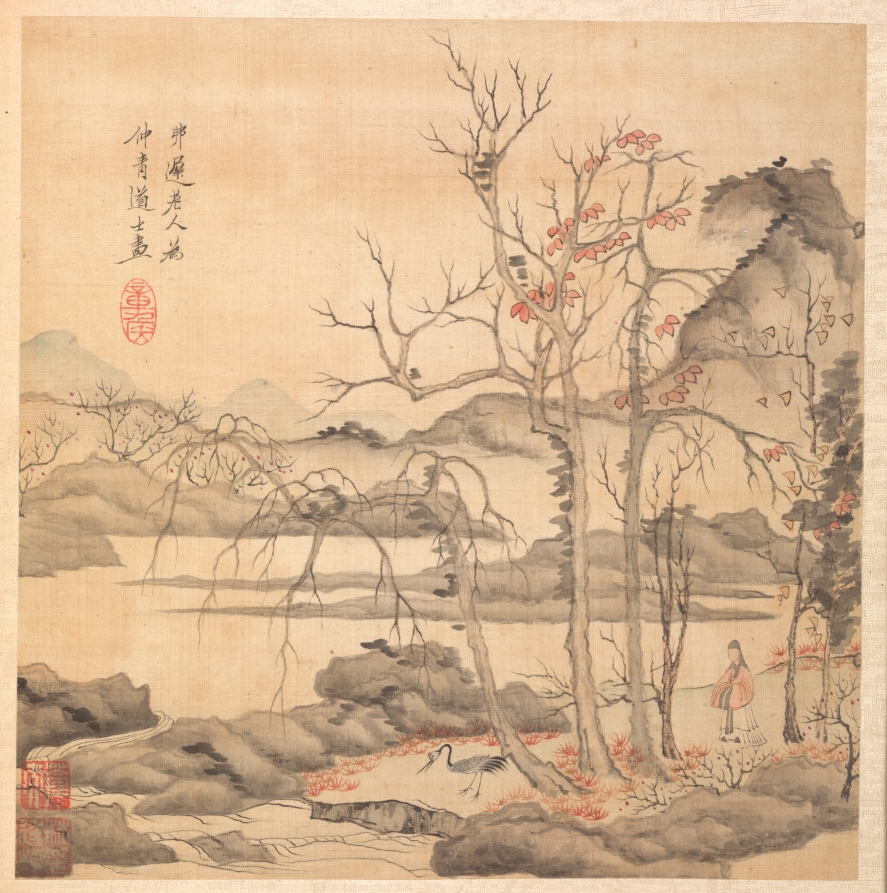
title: Paintings after Ancient Masters: Daoist and Crane in Autumn Landscape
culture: China, Ming dynasty (1368–1644)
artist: Chen Hongshou (Chinese, 1598/99–1652)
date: 1598–1652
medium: album leaf; ink and color on silk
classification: Painting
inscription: The old man Fu-ch'ih painted for the Taoist Chung-ch'ing. [Seal] Chang-hou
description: The twenty paintings in this double-album by Chen Hongshou include landscapes, figures, and flowers. It also has one leaf featuring a woman, an often-used subject not found in the other albums from the latter part of his career. His late works are wonderful summations of Chen's peculiar and quirky art--archaistic, hyper-refined--but without accompanying shallowness or sentimentality. His figures and landscapes in the late albums are miniaturized, not unlike the small Chinese gardens, or the carefully selected small table rocks or old roots used for contemplation to see the world in miniature. This loss of scale is quite deliberate and reflects the psychological situation of a depressed class like the Ming loyalist officials and scholars, deprived of their integrity and honor, and forced to lead a diminished and restricted existence.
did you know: In Chinese culture, cranes are often associated with Daoism and immortality.